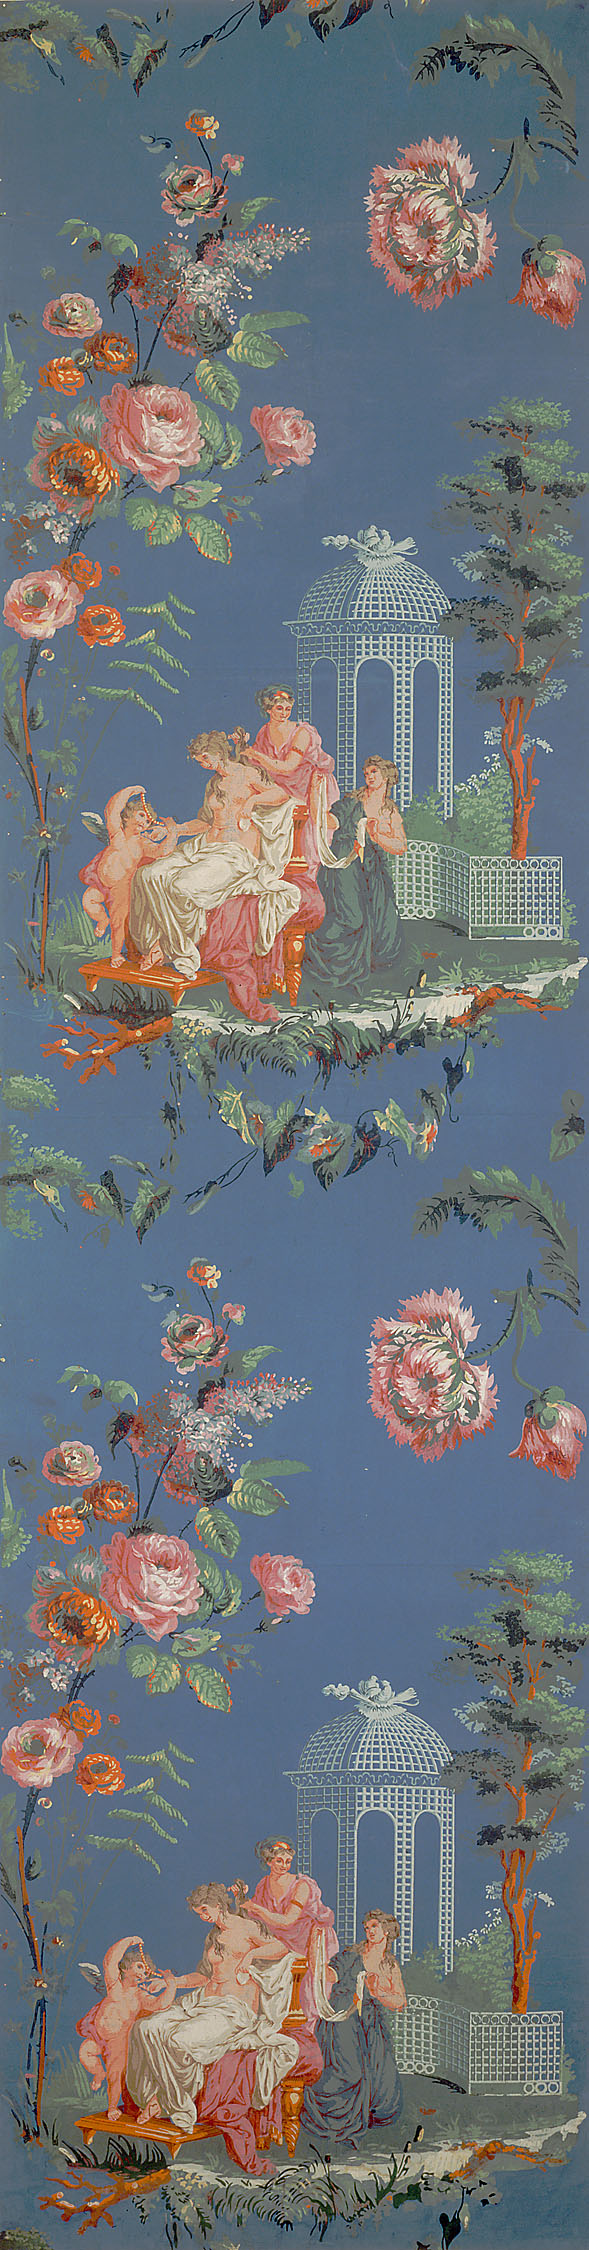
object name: Coverings and Hangings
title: Wall Panel: Toilette of Venus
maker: France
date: 18th century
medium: Block-printed paper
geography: France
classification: wallpaper; paper; european decorative arts